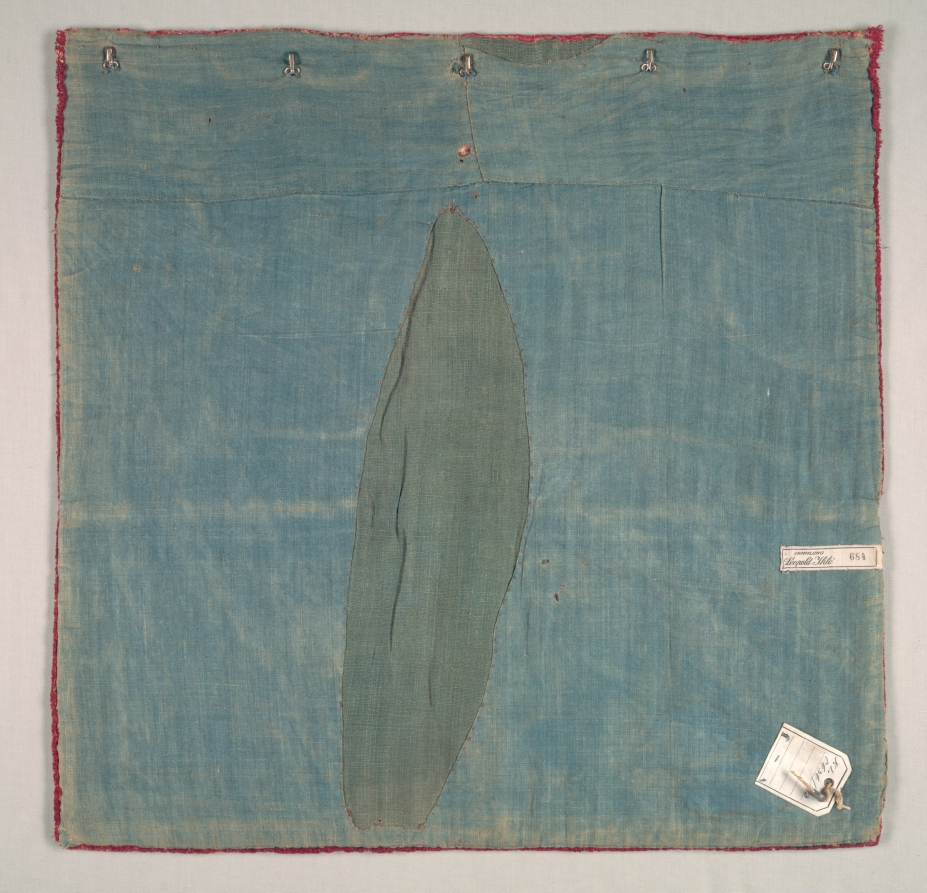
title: Embroidered Sleeve from a Dalmatic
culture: Italy, Florence, 16th century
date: 1500–1525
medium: Silk, gold and silver thread; velvet, embroidery: or nué (shaded gold), split, satin, and couching stitches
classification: Textile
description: This sleeve belonged to an ecclesiastical garment called a dalmatic. Gold and silver thread form overlapping lattices with crowns on crimson velvet. In the scene, Christ washes the feet of Peter, who is accompanied by other apostles. Gold thread dominates, in the shaded-gold technique (or nué), its brilliance varying based on the density of the silk thread crossing over it. The resulting high quality could only have been achieved by a master embroiderer working from a good painter’s design.